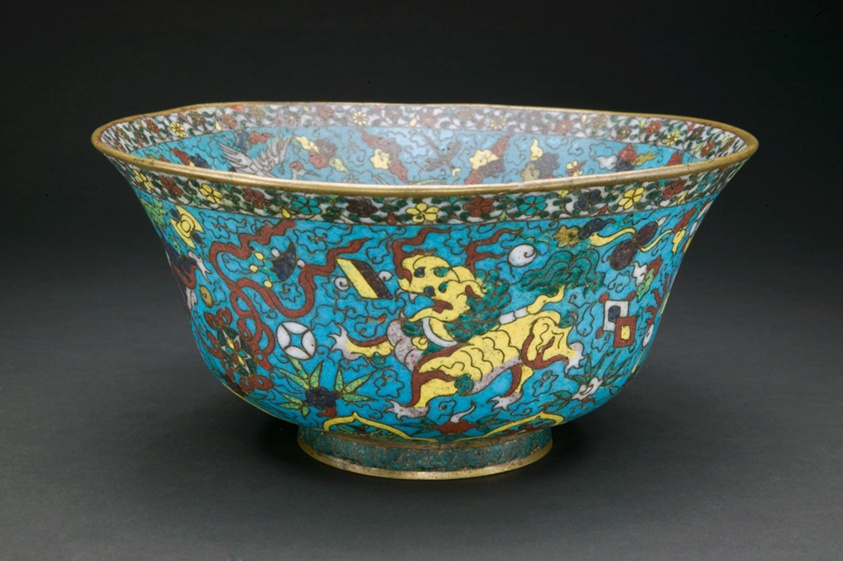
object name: Vessel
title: Bowl with Mandarin Ducks, Cranes, Auspicious Creatures, and Stylized Flowers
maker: China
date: Ming dynasty (1368–1644), first half of 16th century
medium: Cloisonne enamel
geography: China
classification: bowl; metal; dish (vessel); vessel; asian art